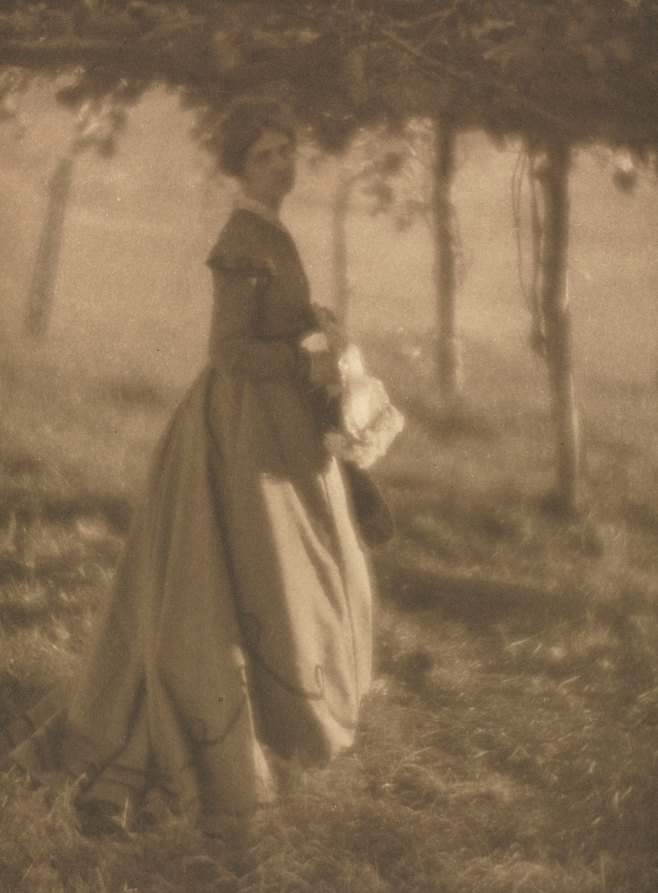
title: Camera Work: The Arbor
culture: America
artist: Clarence H. White (American, 1871–1925)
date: 1908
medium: photogravure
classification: Bound Volume